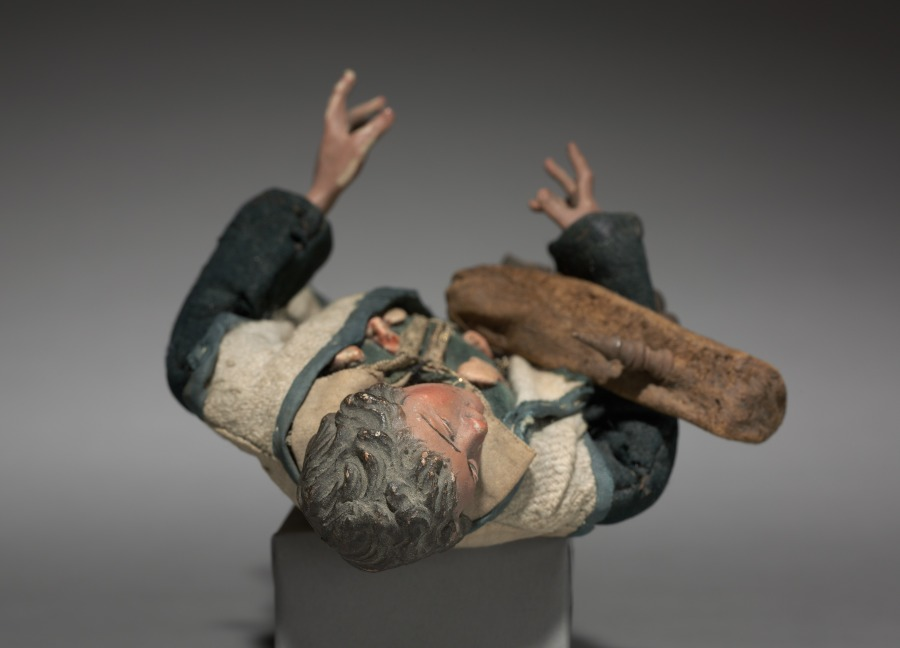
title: Figure from a Crèche: Piper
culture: Italy, Naples, late 18th-early 19th century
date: 1780–1830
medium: painted wood and terracotta with various textiles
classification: Sculpture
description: The practice of creating scenes of the Nativity for the home dates from the early 1700s in Italy, where people began to set up doll-like figures of about a foot or less in height. The custom was particularly popular in Naples around 1800, where crèche scenes (crèche means cradle, or crib) included many figures, whose heads and hands of painted terracotta, stuffed cloth bodies, and clothing adapted from contemporary local costumes gave them an amazingly realistic character. Representations of the birth of Jesus can be traced to the first few centuries of Christianity. Both living creatures and sculptural depictions of them were used from early times. By the late middle ages it was customary to create life-size figures of wood or stone, naturalistically painted, to represent the characters who participated in the events of Jesus's early life. These sculptures were then arranged in scenes illustrating one or both of the most important of these events, the Adoration of the Shepherds and the Adoration of the Magi-the three kings from the East who came to pay homage to the Christ child. Used in churches, these large figures were especially popular in Italy, Central Europe, Spain, and Portugal.